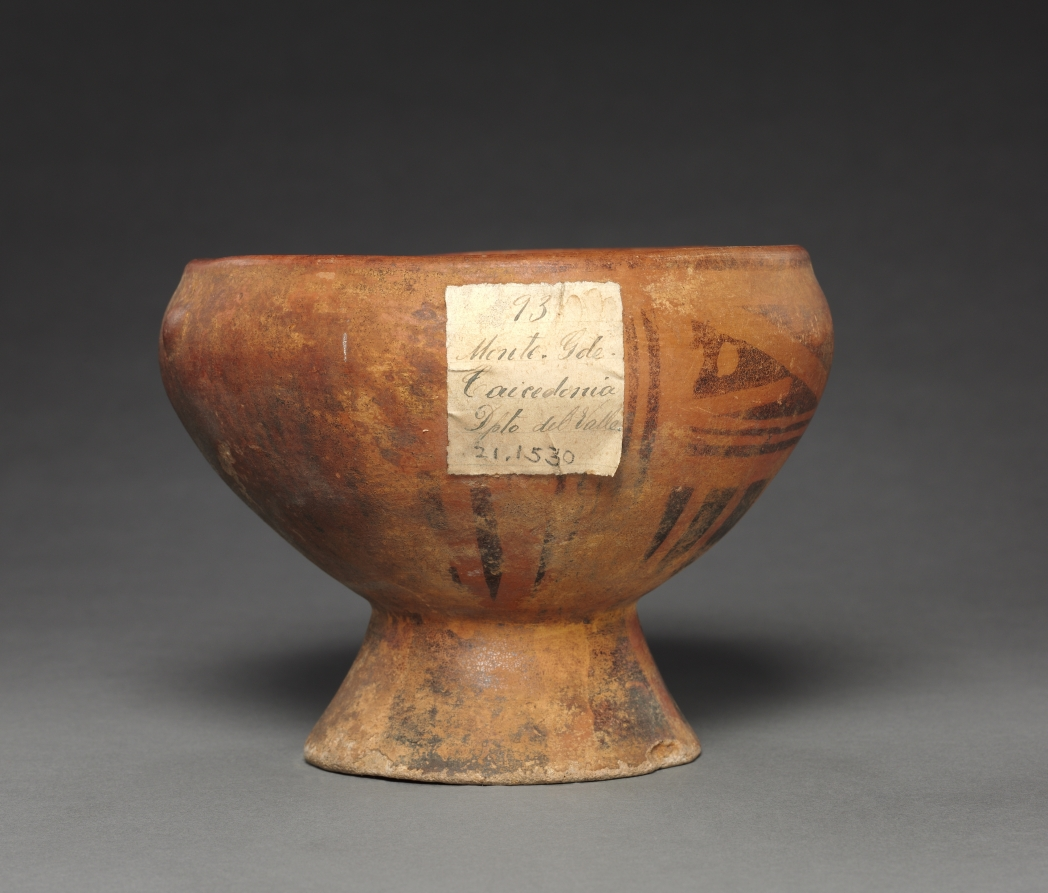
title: Vase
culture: Colombia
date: before 1550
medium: red ware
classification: Ceramic